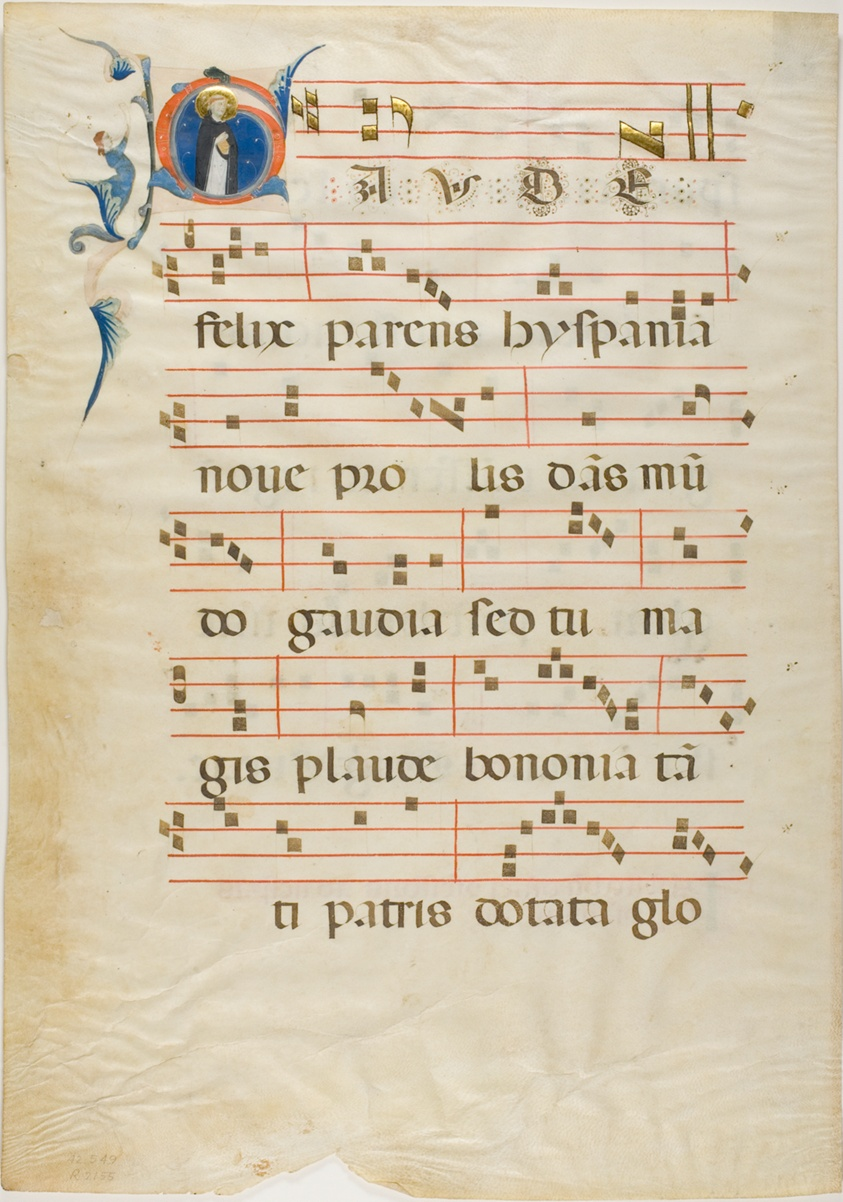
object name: Drawing and Watercolor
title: Saint Dominic in a Historiated Initial "G" from an Antiphonary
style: medieval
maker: Italian (Rimini); Neri da Rimini (Italian, active 1300-1338)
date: 1310/15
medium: Manuscript cutting in tempera and gold leaf, with gothica textualis inscriptions in Latin in black ink, ruled in red, and with other decorations, on parchment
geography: Italy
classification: tempera; manuscript; drawings (visual works); prints and drawing